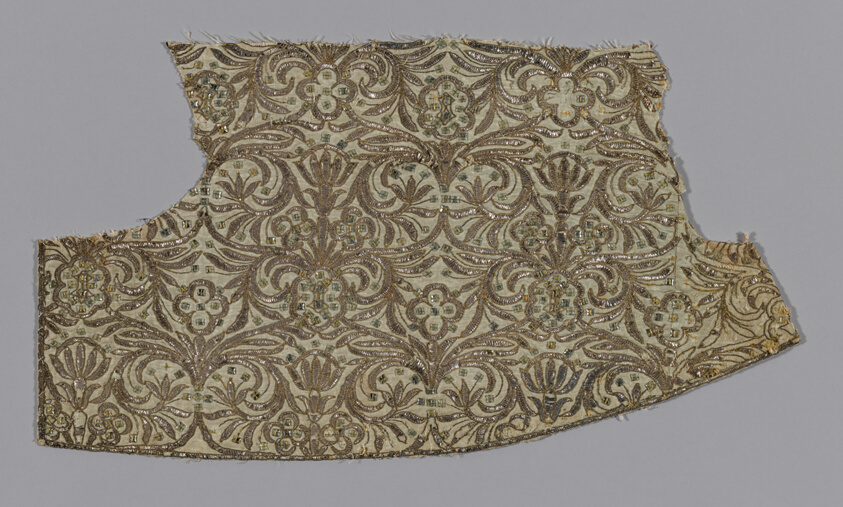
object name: Textile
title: Portion of Dress for a Madonna Statue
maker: Probably Spain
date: 18th century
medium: Silk, plain weave; embroidered with silvered-metal strips and gilt-metal-strip-wrapped silk in stem stitches; laid work and couching; square glass pieces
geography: Spain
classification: textile; weaving; costume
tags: foliage, flowers